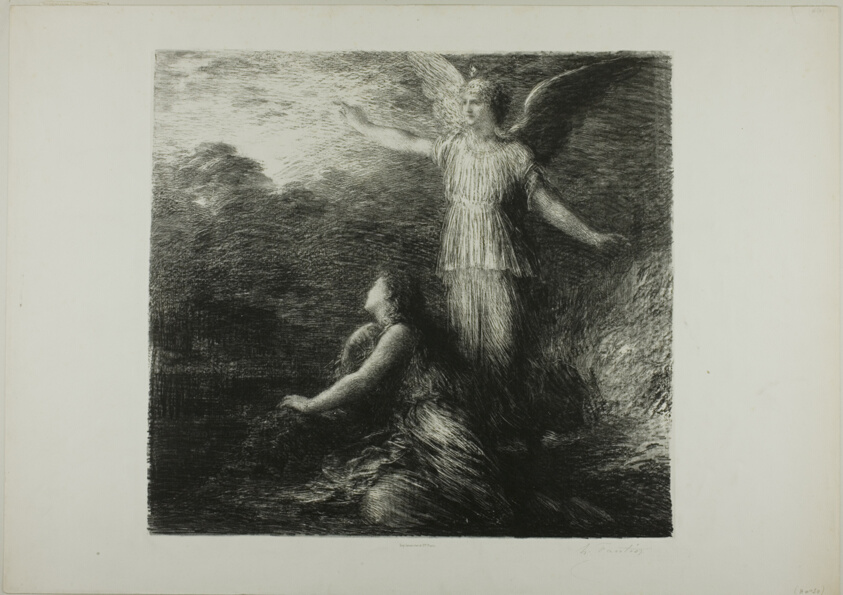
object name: Print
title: Paradise and the Peri (Opening), first plate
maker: Henri Fantin-Latour (French, 1836-1904)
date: 1884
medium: Lithograph in black on ivory China paper laid down on ivory wove paper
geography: France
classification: lithograph; print; prints and drawing